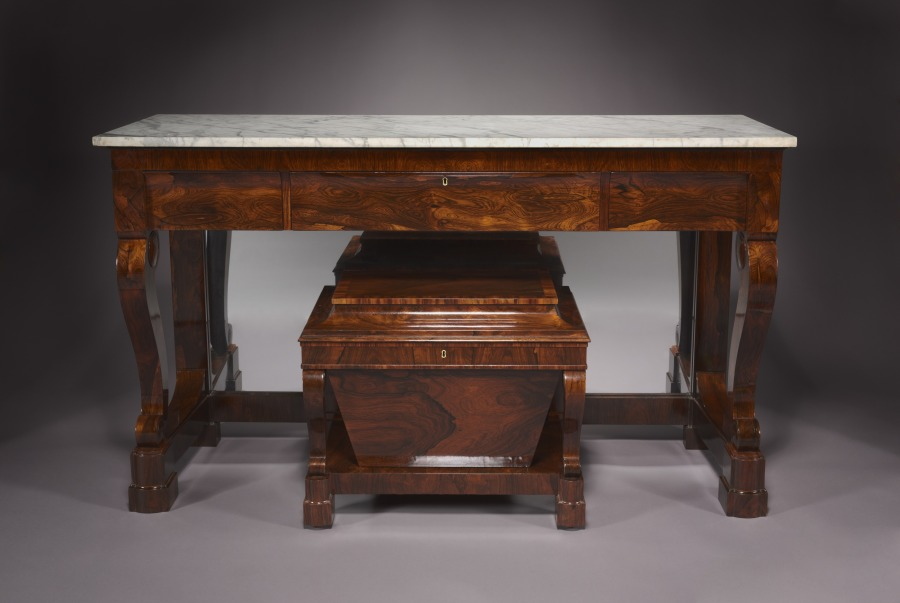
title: Sideboard and Cellarette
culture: America, New York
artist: Duncan Phyfe and Son (American, 1768–1854)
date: c. 1840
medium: chiefly rosewood veneer with pine and poplar secondary woods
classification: Furniture and woodwork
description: This sideboard and cellarette would have graced a 19th-century room. Notice the keyholes on the drawers of both pieces. Expensive silver utensils were stored in the sideboard and wine was kept under lock and key in the cellarette.